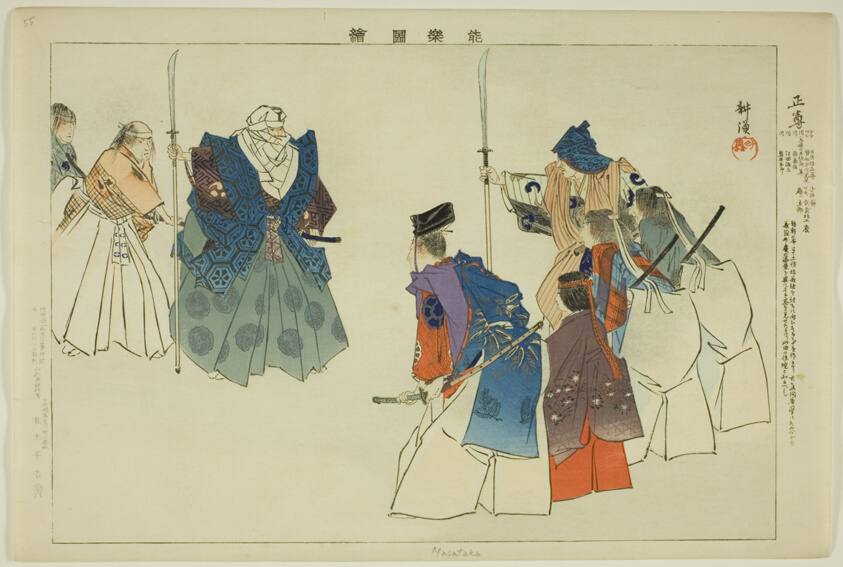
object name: Print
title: Masataka, from the series "Pictures of No Performances (Nogaku Zue)"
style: Japanese (culture or style)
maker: Tsukioka Kogyo; Japanese, 1869-1927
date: 1898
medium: Color woodblock print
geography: Japan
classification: woodblock print; print; asian art